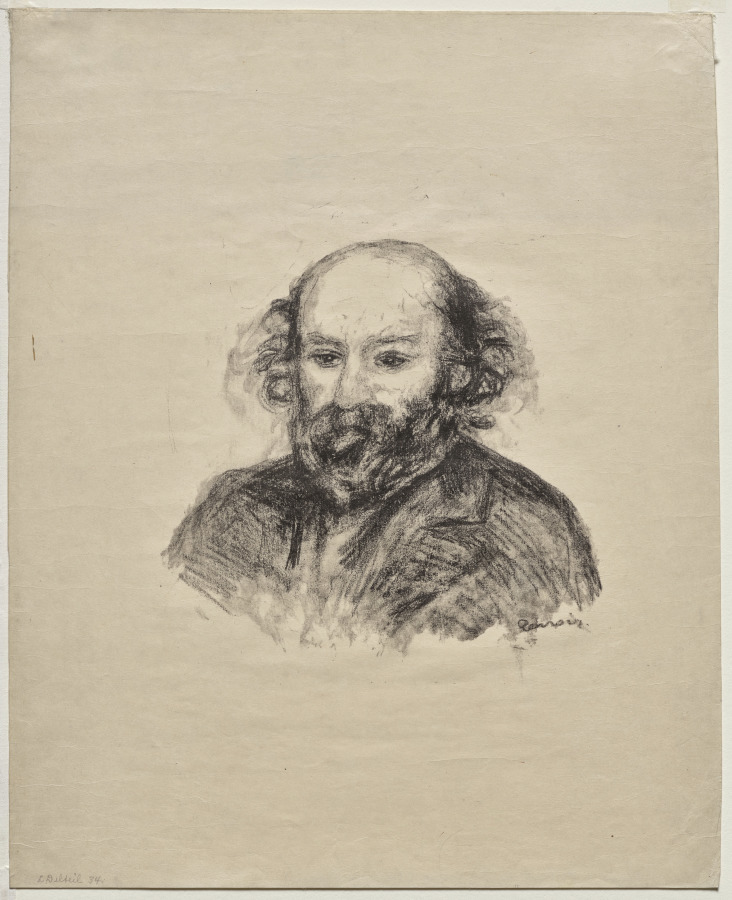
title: Paul Cézanne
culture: France, early 20th Century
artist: Pierre-Auguste Renoir (French, 1841–1919)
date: 1902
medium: lithograph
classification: Print